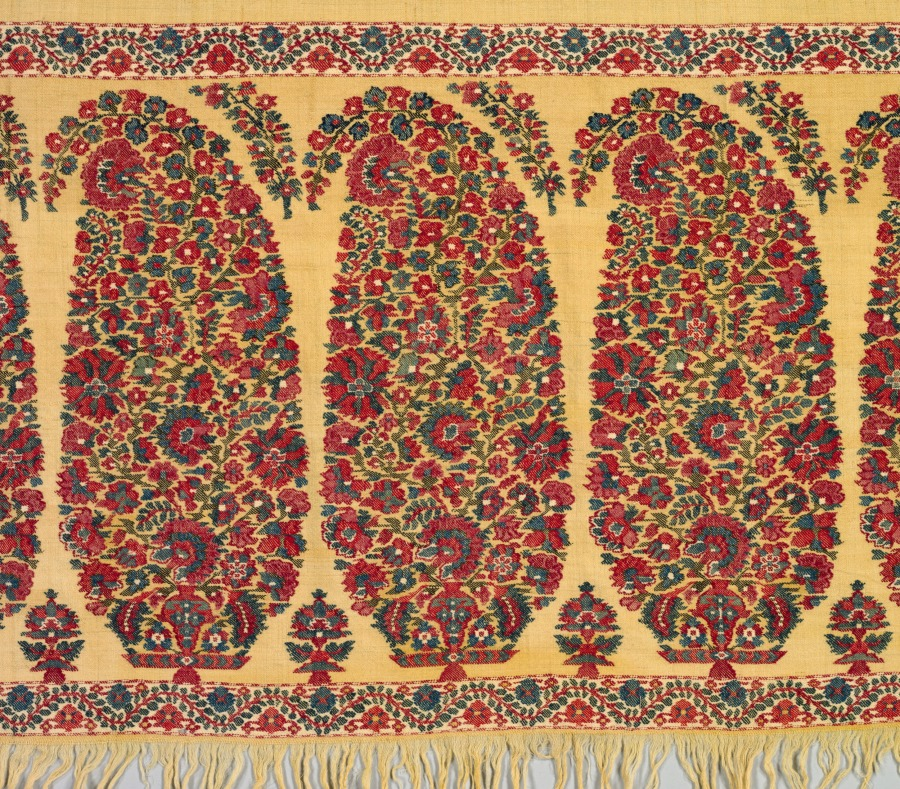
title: Yellow Long Shawl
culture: India, Kashmir, Afghan period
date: before 1815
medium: 2/2 twill tapestry weave [S], double interlocking; wool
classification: Textile